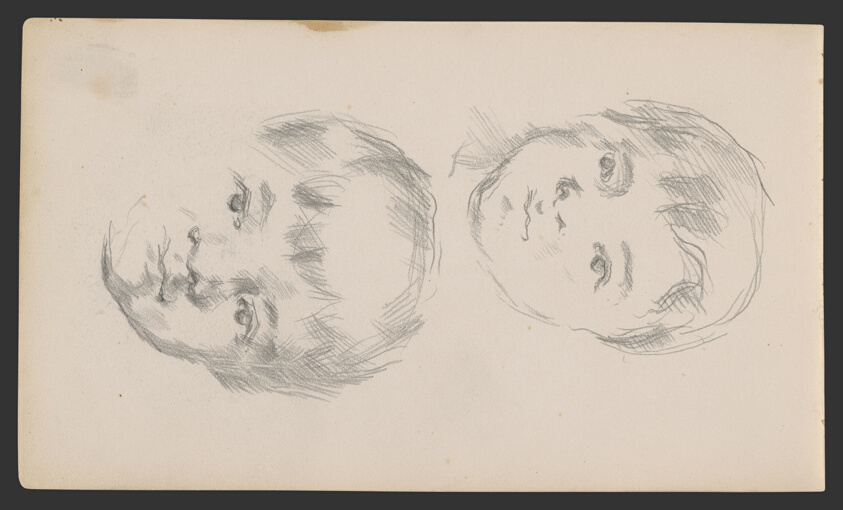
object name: Drawing and Watercolor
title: Sketchbook No. 2 (L'Estaque)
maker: Paul Cézanne; French, 1839-1906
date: 1875–86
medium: Graphite and pen and ink drawings on paper, bound into a book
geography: France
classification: sketchbook; graphite; prints and drawing; paper